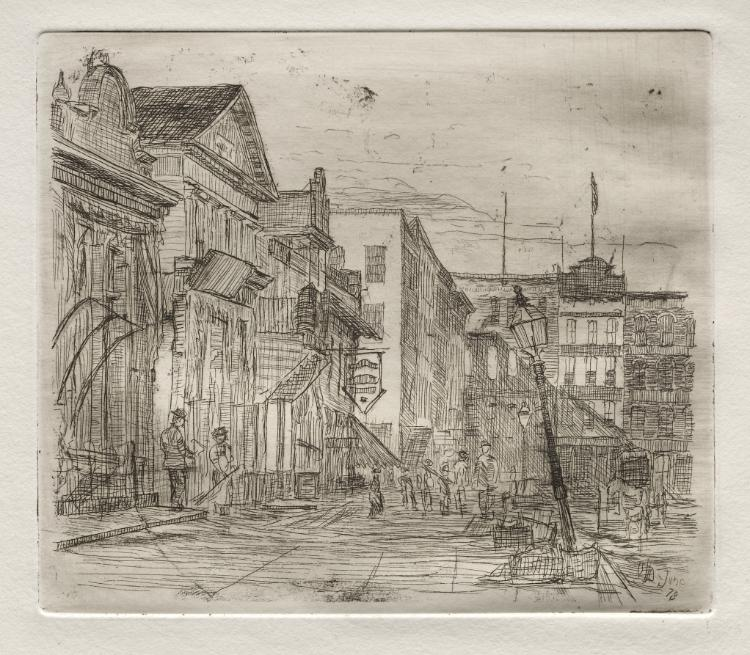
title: Southwest Corner, Public Square, Cleveland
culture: America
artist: Otto H. Bacher (American, 1856–1909)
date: 1878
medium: etching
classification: Print